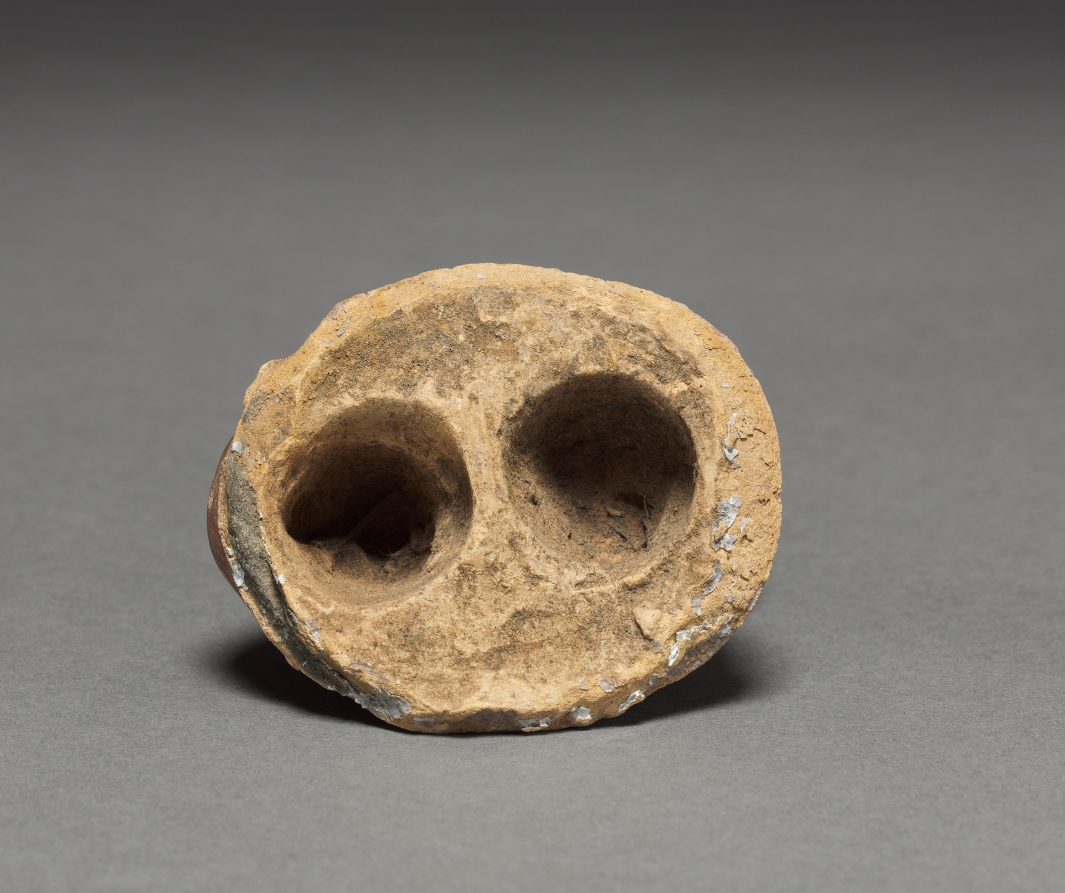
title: Jar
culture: Colombia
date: before 1550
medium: black ware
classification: Ceramic